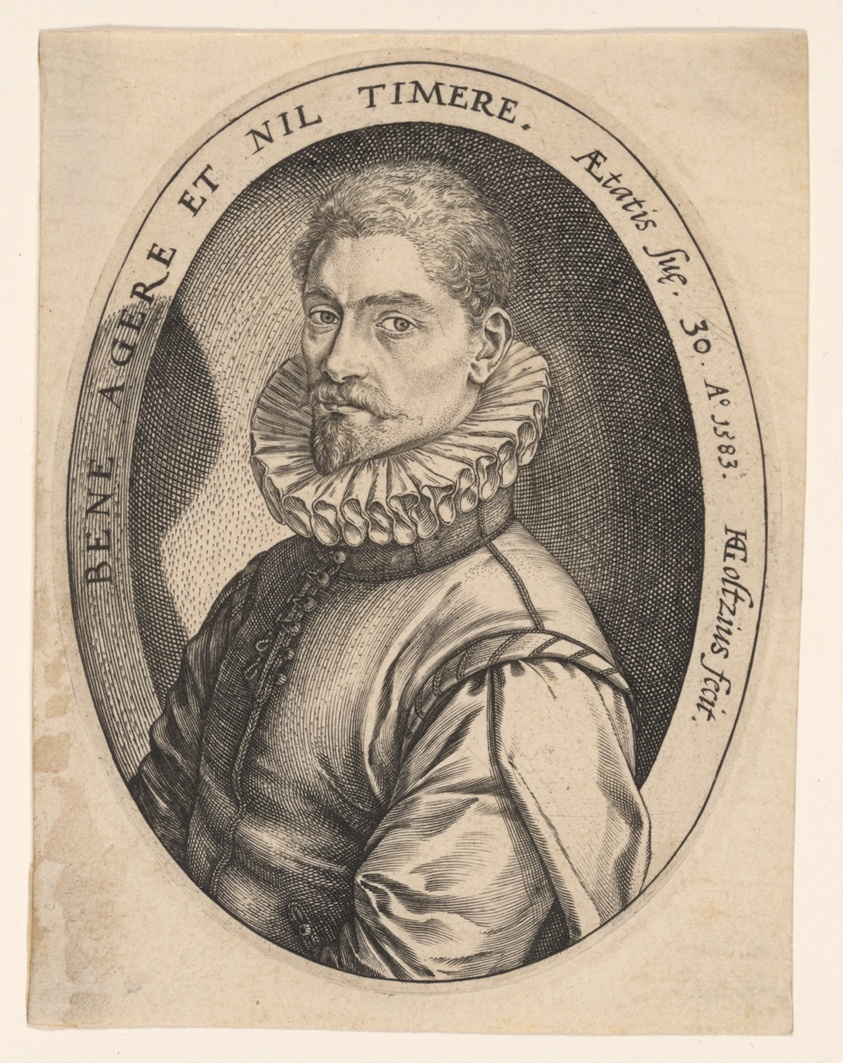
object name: Print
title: Hieronymous Scholiers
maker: Hendrick Goltzius (Dutch, 1558–1617)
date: 1583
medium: Engraving on parchment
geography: Netherlands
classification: print; engraving; prints and drawing